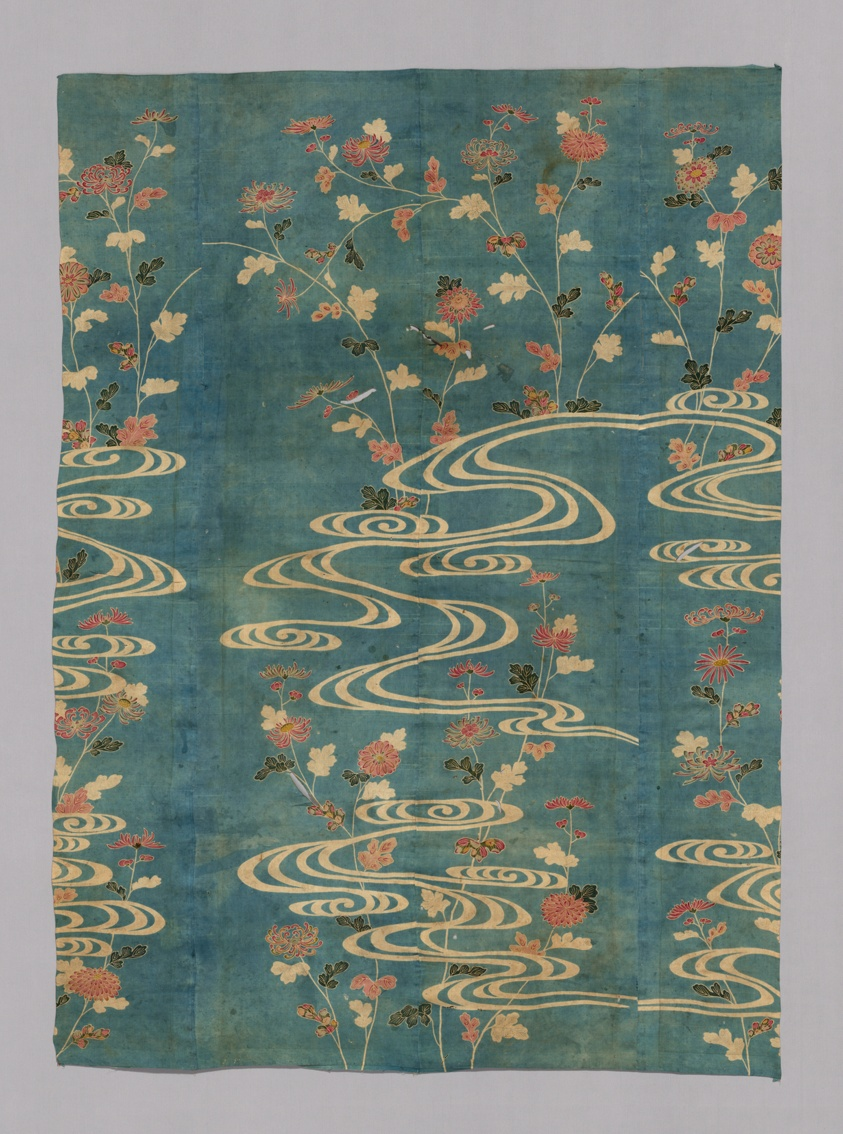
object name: Textile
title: Kosode (Robe)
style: middle edo, edo (japanese period), Japanism, East Asian, asian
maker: Japan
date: Edo period (1615–1868), 1701/25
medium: Silk, plain weave; resist dyed and painted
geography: Japan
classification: textile; weaving - printed